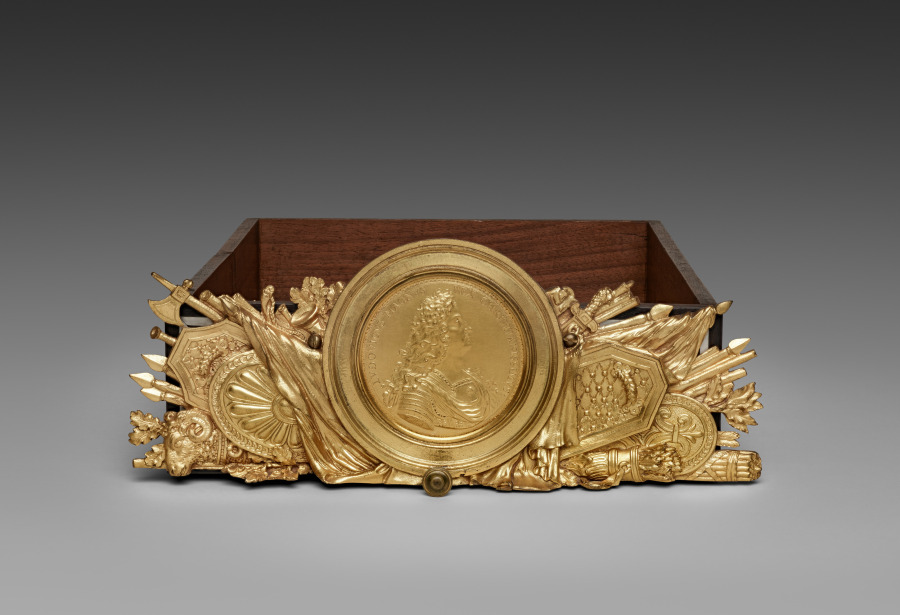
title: Center Drawer for Cabinet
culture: France, late 17th Century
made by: André-Charles Boulle (French, 1642–1732)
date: c. 1690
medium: ebony, marquetry in metal and tortoiseshell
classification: Furniture and woodwork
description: Appointed cabinetmaker to King Louis XIV in 1672, André-Charles Boulle became a master of furniture making in France during the late 1600s until his death in 1732. Known primarily for his use of marquetry, in which metal patterns are inlaid into tortoiseshell then applied within the veneered surface of the furniture, Boulle established a level of quality and craftsmanship few others could achieve. As a result, his work found favor at the royal court and among other aristocrats and diplomats eager to impress the king. The inclusion of a medallion depicting Louis XIV within the bronze decoration of this chest would have identified the owner with the royal court. Often exhibiting stout architectural proportions with elegant groups of inlaid motifs such as the parrot on the central panel of this chest, Boulle’s designs are an example of the intellectual fashion for contrasting ideas, materials, and motifs.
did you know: Originally designed to sit atop an elaborate tall stand, this chest was likely altered in the late 1700s to reduce its scale and height.